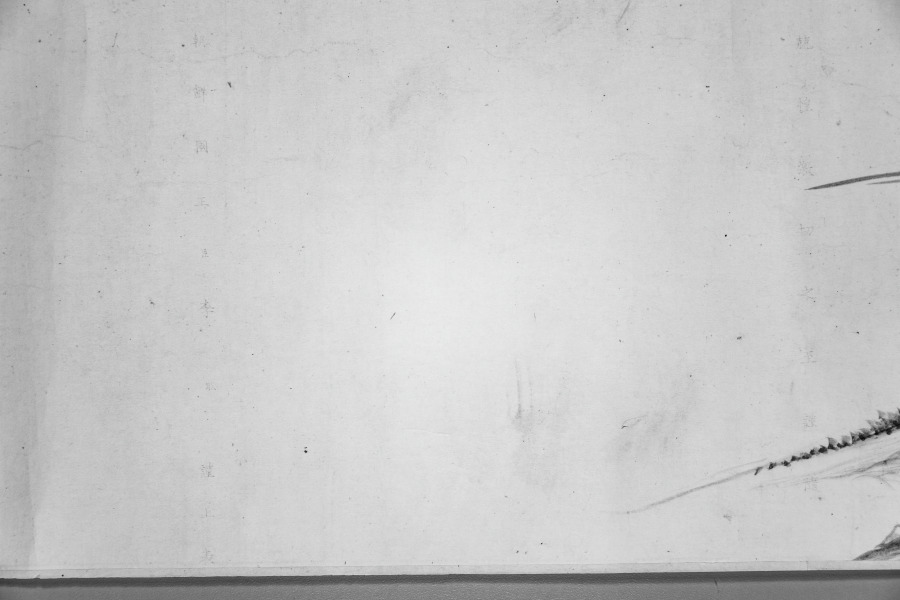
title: River and Mountains on a Clear Autumn Day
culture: China, Ming dynasty (1368–1644)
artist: Dong Qichang (Chinese, 1555–1636)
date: c. 1624–27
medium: Handscroll; ink on Korean paper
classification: Painting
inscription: 黃子久江山秋霽似此，當恨古人不見我也。思翁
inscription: 董文敏每遇高麗鏡面箋，書畫尤為入神。此卷改表紙用之，字跡隱然，兼有朝鮮之印。至於筆法圓秀，真接倪黃。豈文沈所可同日而語也。 康熙庚午中秋後一日，天氣澄爽，重裝初畢，跋於瓶廬。抱瓮翁高士奇。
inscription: Second inscription by Gao Shiqi 高士奇 (1645–1704): On the twenty-third day of the ninth month, the jiaxu year of the Kangxi era [1694], I packed my bags to head north. When my boat passed Wuchang [Suzhou], Mr. Mantang [Song Luo] brought wine to bid me farewell so that we could share our thoughts on our separation in the last few years. I showed him the paintings and calligraphy which I collected and asked his opinions. Since Mr. Mantang does not own any handscrolls by Wenmin [Dong Qichang], I leave this one for him in commemoration of our parting; thus the painting will have a worthy owner and our meeting will become a beautiful story in the future. It is the fourth day after the beginning of winter, with the sky clear and sober. Trees under frost have turned red and yellow, seemingly echoing the brush and ink in the painting. I also ask Mr. Mantang to inscribe a poem to commemorate our meeting so that it will survive forever.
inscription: 1 colophon and 4 seals of Song Luo 宋犖 (1634–1713): Who is the foremost art connoisseur of our dynasty?/ Tangcun [Liang Qingbiao, 1620–1691] is dead, so the title passes to Jiangcun [Gao Shiqi]./ Leaving office, you retired for five years in the Lake region./ Fondling handscrolls and hanging scrolls from morning to evening./ You sent me your collection catalogue Xiao Xia Lu last year;/ It is indeed the true equal of [Zhou Mi's] Yun Yan Guo Yan./ This year you returned to the capital by imperial order;/ Your boat with calligraphy and paintings anchored at the river bank in Suzhou./ When we met each other you did not waste any time for conversation by poured out immediately/ From your "coral net" extraordinary treasures./ You produced incomparable scrolls, with gold-inscribed labels and jade rollers,/ Pouring out from bags and trunks, they were spread in disarray./ Without a word, I rolled and unrolled until my fingers were numbed,/ We sat straight, facing each other quietly, and never felt tired./ For three days we forgot about sleeping and food./ And at times we shouted our joy out loud, forgetting who is host or guest./ Your Dwelling in the Fuchun Mountains and the Yuansheng manuscript/ These peerless works I myself examined with delight./ As an added pleasure to the farewell dinner under the Maple Bridge,/ You allowed me to hold again this handscroll by Dong Qichang--/ The Misty River and Piled Peaks [by Zhao Mengfu] and this Clear Autumn Day are two extraordinary masterpieces./ In showing such life and spirit with "qi yun." the artists were truly "men of heaven."/ The Clear Autumn Day is not even three feet long,/ Painted on tributary Korean paper, it shines like silver./ Every building up and every turn of the mountains imitates nature,/ Every tree and every rock is removed from the commonplace./ From the beginning, the theory of poetry is the theory of painting,/ Like the lotus and the morning sunshine, they complement and refresh each other./ The artist's inscription regrets that "the Old Masters cannot see my scroll."/ Huang Gongwang would have agreed in his grave./ The vermilion of the seals glitter and dazzles the eyes,/ These added accessories are as valuable as jade./ You are very kind to give it to me,/ The feelings expressed in your inscription are so sincere./ Wanting to refuse, but unable, I accept it to respect your wish,/ And taking off my gown and cap I wrapped it with care./ You asked me to write a long poem in commemoration of this beautiful occasion,/ I am too ashamed that my effort in response is so poor and inadequate./ Returning home, I unrolled it under candlelight, trying to write the colophon,/ The light of the waning moon shines at the foot of the mossy wall./ Earnestly humming and brows knit in deep thought, I try to compose;/ The verses are not outstanding, but the facts are real./ With this poem recorded at the end of the scroll, I mail it to you for approval,/ This poem and this painting shall outlast a thousand springs. (Translation by LYSL/HK/WKH)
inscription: 1 colophon and 2 seals of Shao Changheng 邵長蘅 (1637–1704); 2 inscriptions and 14 seals of the Qianlong 乾隆 emperor (r. 1736–95); 1 seal of the Jiaqing 嘉慶 emperor (r. 1796–1820); 3 seals of the Xuantong 宣統 emperor (r. 1908–11); 1 seal unidentified.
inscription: [印] 朝鮮國王之印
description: Dong Qichang had a tremendous impact on the artistic practices and historiography of later generations; his works and writings shaped literati aesthetics. Here, Dong places an abstract landscape composition diagonally across the picture plane, configured to recall earlier masters and simultaneously express his own personal style. Dong’s inscription claims, Huang Gongwang’s Autumn Day, looks like this. I truly regret the master has not seen my work. In fact, Dong Qichang may have had Dong Yuan’s Xiao and Xiang Rivers in mind, a work he owned and considered a key work in Chinese art history.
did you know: The painting has an imprint of a Korean seal that reads "Seal of the king of Joseon."